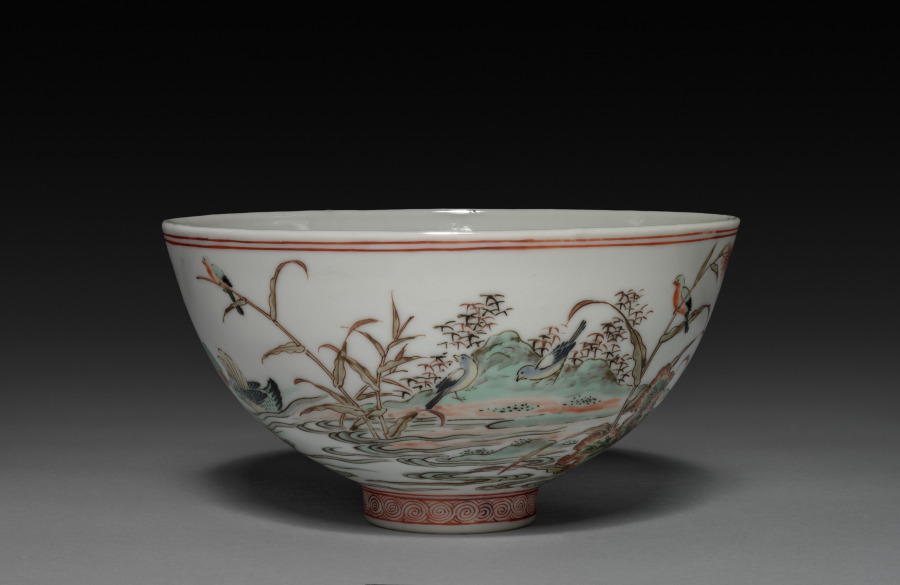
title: Bowl with Waterfowl on a Lotus Pond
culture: China, Jiangxi province, Jingdezhen kilns, Qing dynasty (1644-1911), Kangxi reign (1662-1722)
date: 1662–1722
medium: porcelain with famille verte overglaze enamel decoration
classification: Ceramic